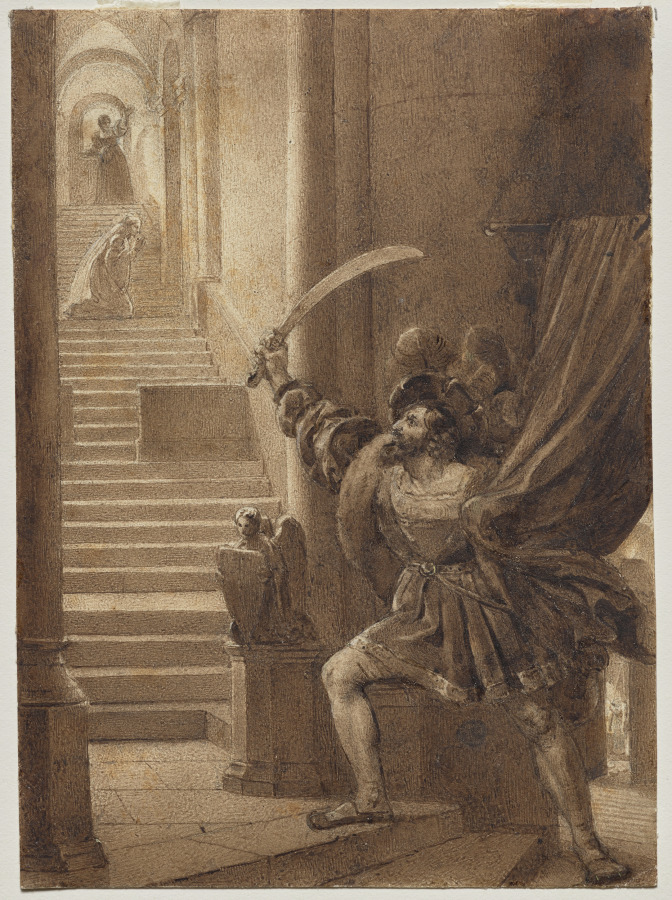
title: François I Brandishing a Sword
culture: France, 19th century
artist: Alexandre-Evariste Fragonard (French, 1781–1850)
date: c. 1815–30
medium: Pen and brown ink and brush and brown wash with graphite underdrawing and white and yellow gouache heightening on wove paper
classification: Drawing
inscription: on verso at left margin, in pencil: no 36 / Fragonard fils / 200F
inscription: at upper right, in pencil: 82/24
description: Alexandre-Evariste Fragonard developed a dramatic, narrative style of drawing that was well suited for illustration, and this sheet may have been one such design. Like many of his contemporaries, Fragonard was interested in modern history, focusing on important figures of the recent past. Here, he likely depicted the French king François I (1494–1547), a frequent subject of his work.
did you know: Alexandre-Evariste Fragonard was the son of the famous painter Jean-Honoré Fragonard, but developed a very different artistic style than his father.